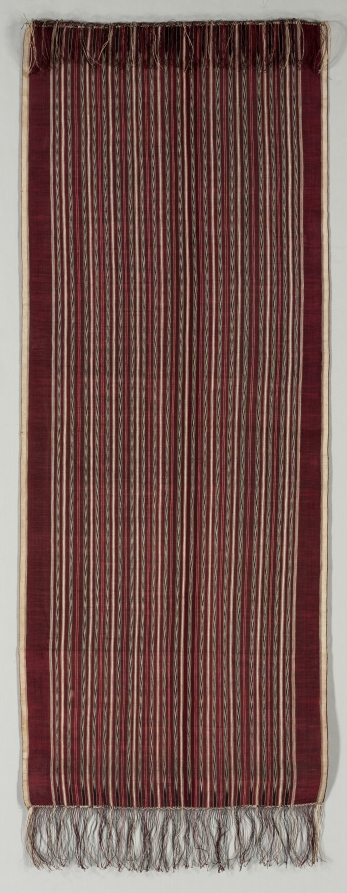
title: Infant's Carrying Cloth, or Man's Ceremonial Headgear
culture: Indonesia, North Sumatra, Toba Batak People, early 20th century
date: early 1900s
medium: warp-faced tabby with areas of ikat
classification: Textile